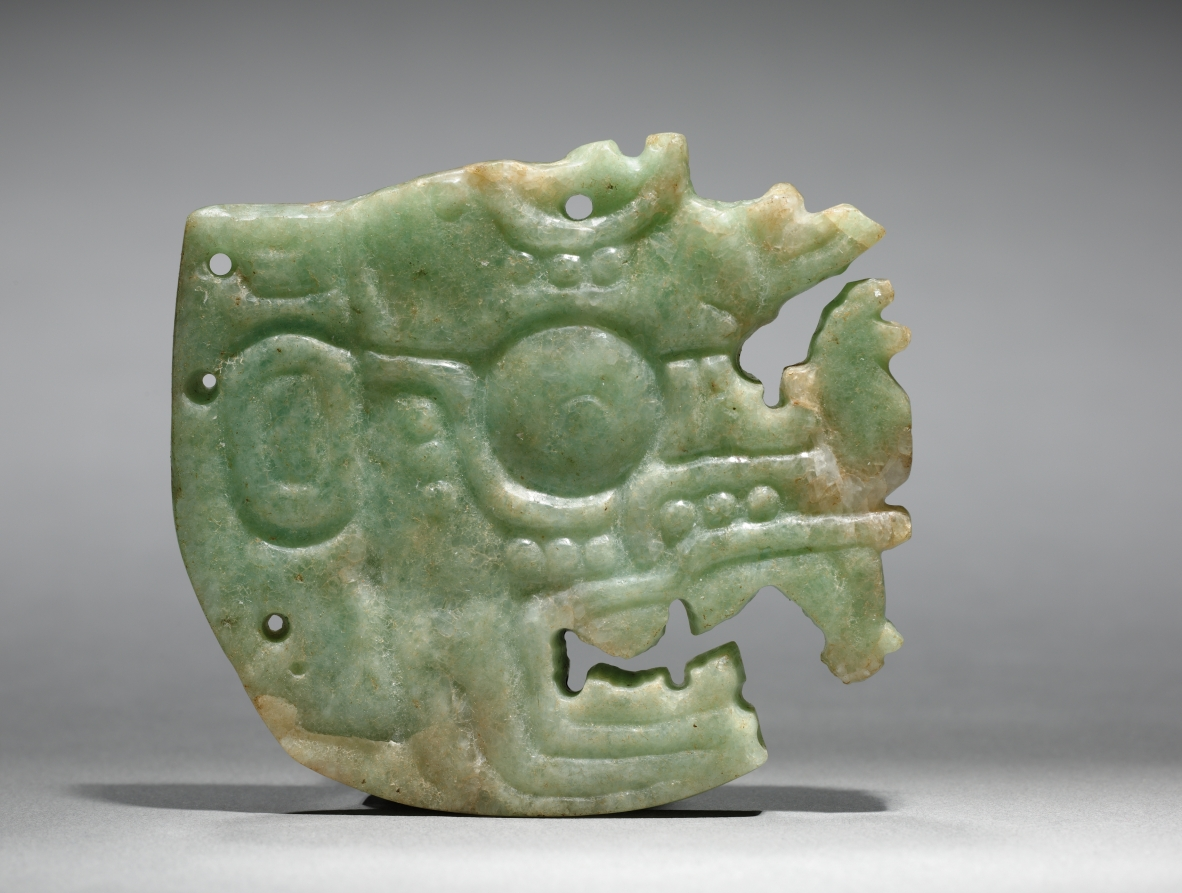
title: Crown Ornament (Hu’unal)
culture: Mexico or Central America, Maya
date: 250–900 CE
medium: jadeite-albitite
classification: Jade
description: This plaque, which represents the head of a deity affiliated with Maya royalty, served as a ruler’s crown ornament (hu’unal). It was attached to the crown via the holes along the back edge in such a way that the identical carvings on both sides were visible. The ornament is now broken along the upper edge.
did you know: This plaque represents the head of a deity affiliated with Maya royalty.